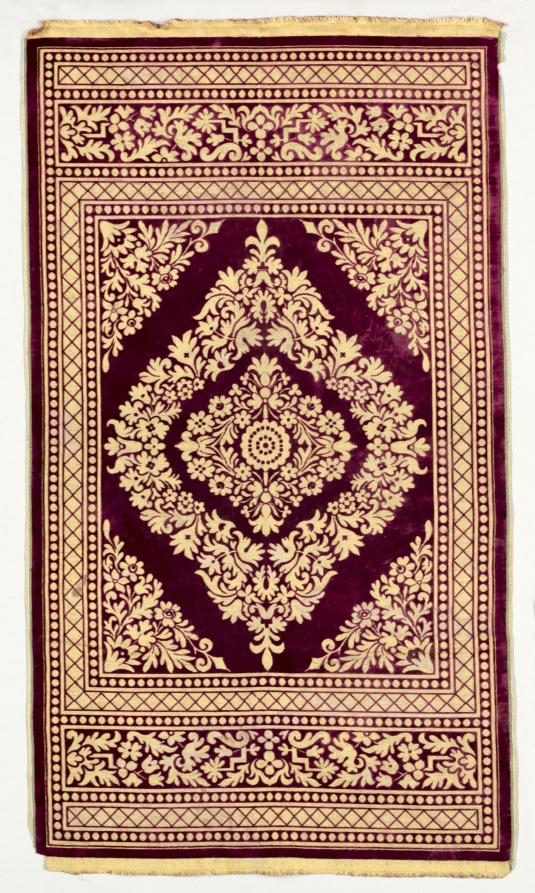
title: Cushion Cover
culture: Italy, 19th century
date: 1800s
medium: velvet; silk and metallic thread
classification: Velvet